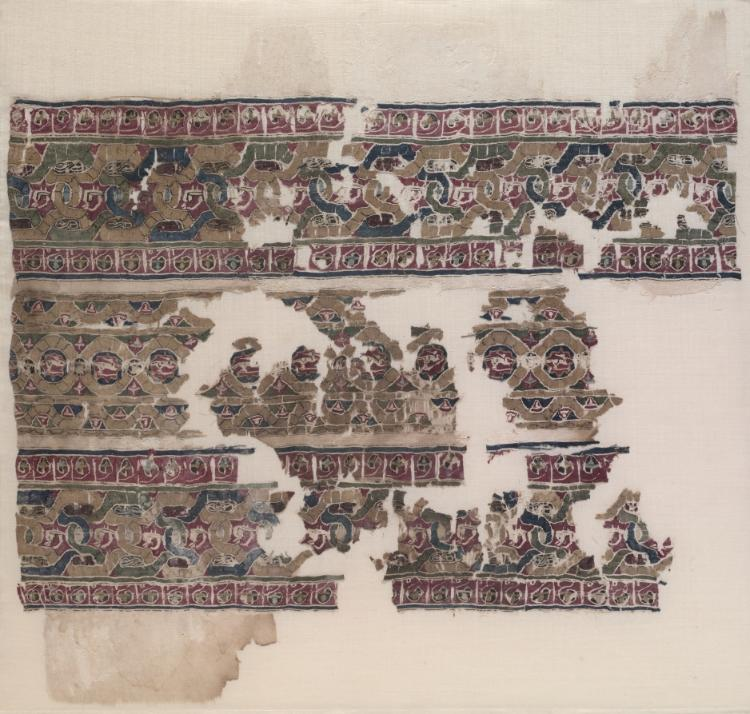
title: Tiraz with guilloche bands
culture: Egypt, Fatimid period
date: 1075–1125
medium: plain weave with inwoven tapestry weave: linen and silk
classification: Textile